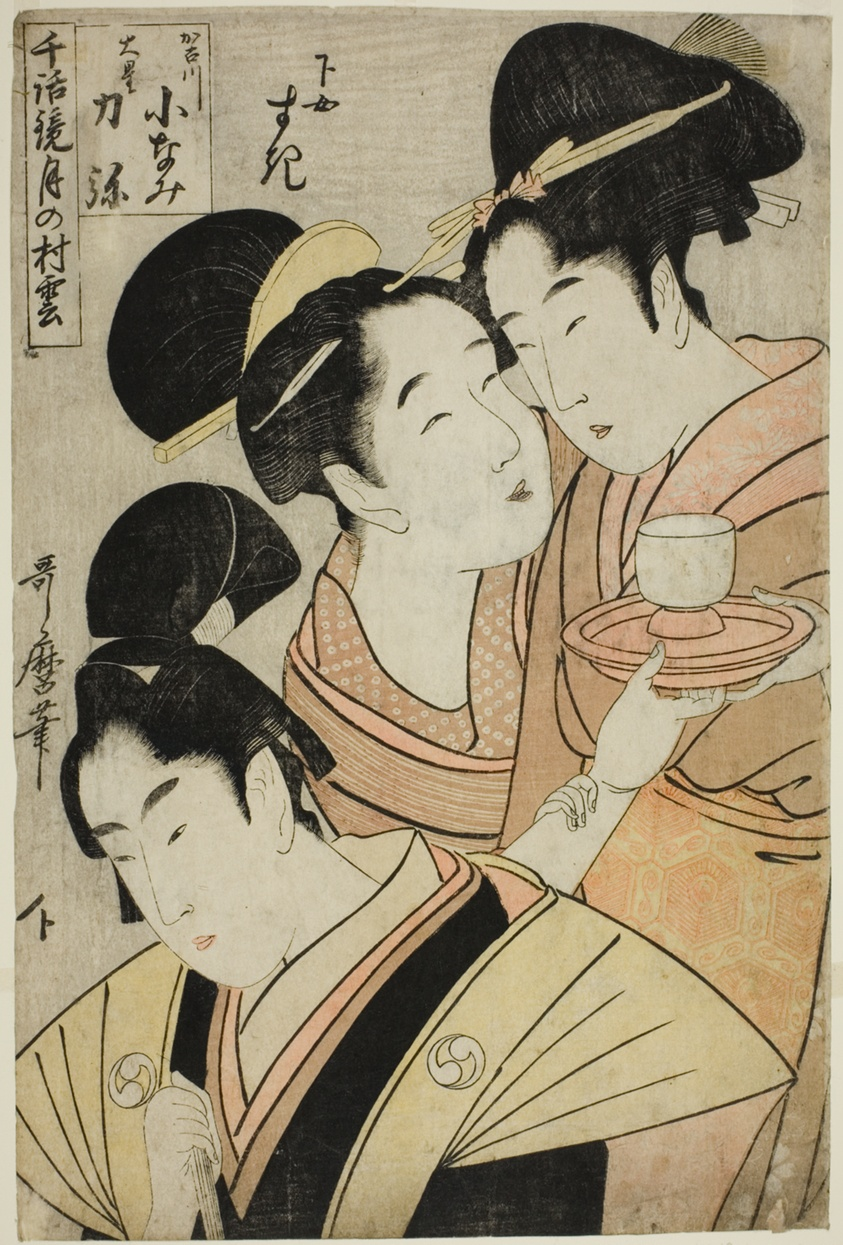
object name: Print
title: Kakogawa Konami, Oboshi Rikiya and the Maidservant Suki, (Kakogawa Konami, Oboshi Rikiya, gejo Suki) from the series "Models of Love Talk: Clouds Form Over the Moon (Chiwa kagami tsuki no murakumo) "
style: Japanese (culture or style)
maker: Kitagawa Utamaro 喜多川 歌麿; Japanese, 1753 (?)-1806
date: c. 1798/1800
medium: Color woodblock print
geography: Japan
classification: woodblock print; print; asian art